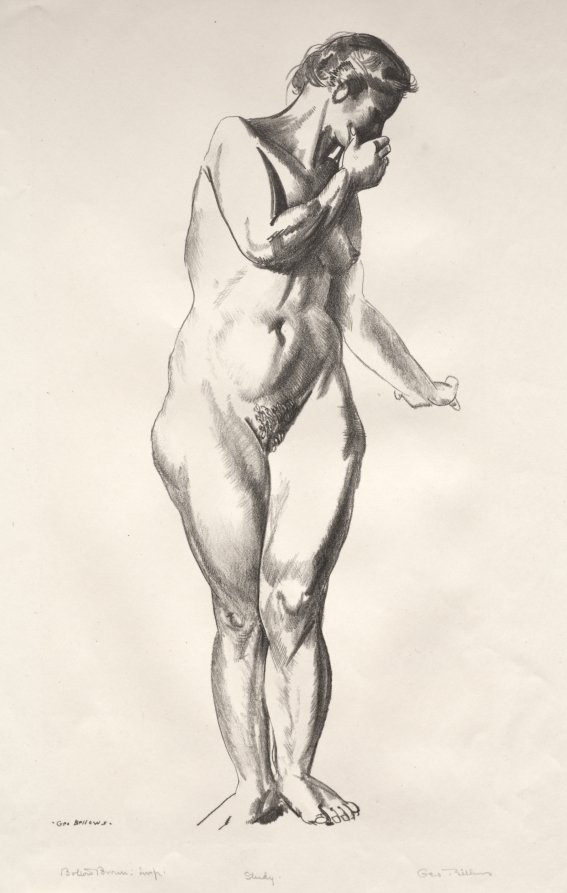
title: Nude Study, Girl Standing with Hand Raised to Mouth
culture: America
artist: George Bellows (American, 1882–1925)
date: 1924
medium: lithograph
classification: Print